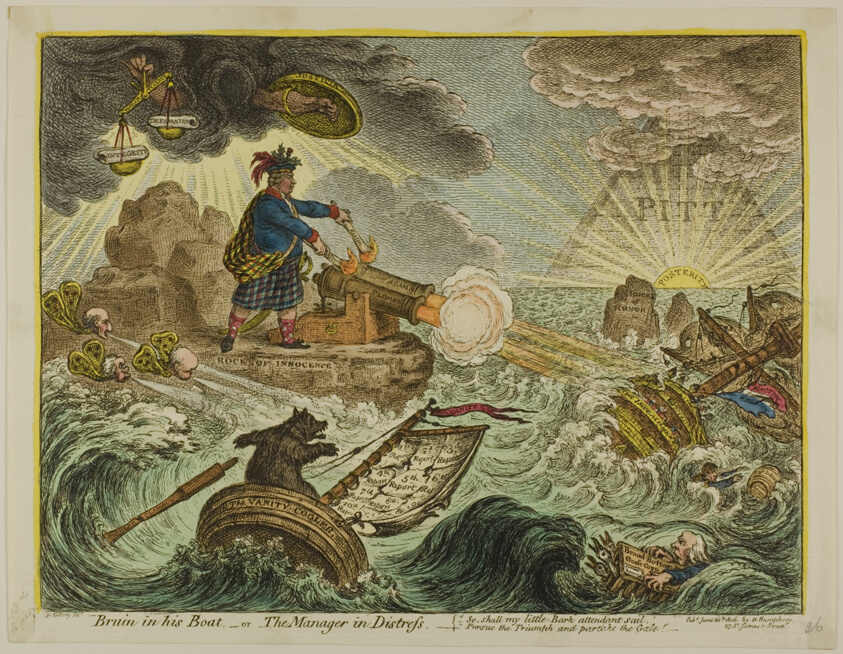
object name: Print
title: Bruin in his Boat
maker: James Gillray (English, 1756-1815); published by Hannah Humphrey (English, c. 1745-1818)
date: published June 20, 1806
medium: Hand-colored etching on paper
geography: England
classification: etching; print; prints and drawing